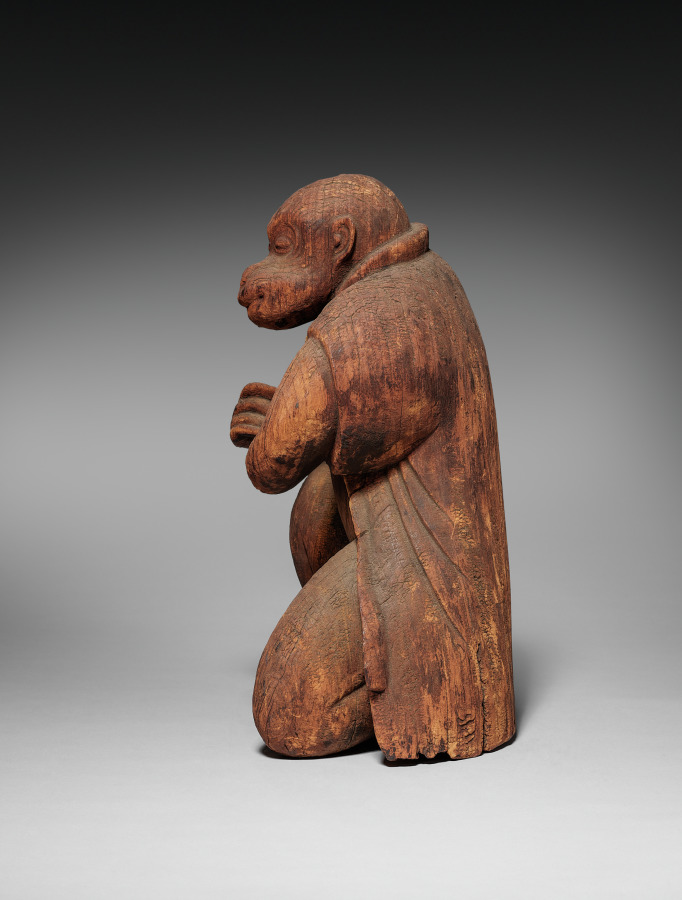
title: Monkey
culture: Japan, Edo period (1615–1868)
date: possibly 1700s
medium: wood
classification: Sculpture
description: Watching monkeys perform was once a popular form of street entertainment in Japan. Monkeys were outfitted with costumes and learned to perform dances and tricks. Monkeys also serve as the messengers of certain kami, or deities, and pairs of clothed monkey sculptures in wood or stone may be found on either side of the entrance of some jinja, or shrines dedicated to kami. This monkey has a jacket and may have once held bells and a fan. Unfortunately, its original identity and purpose have been lost.